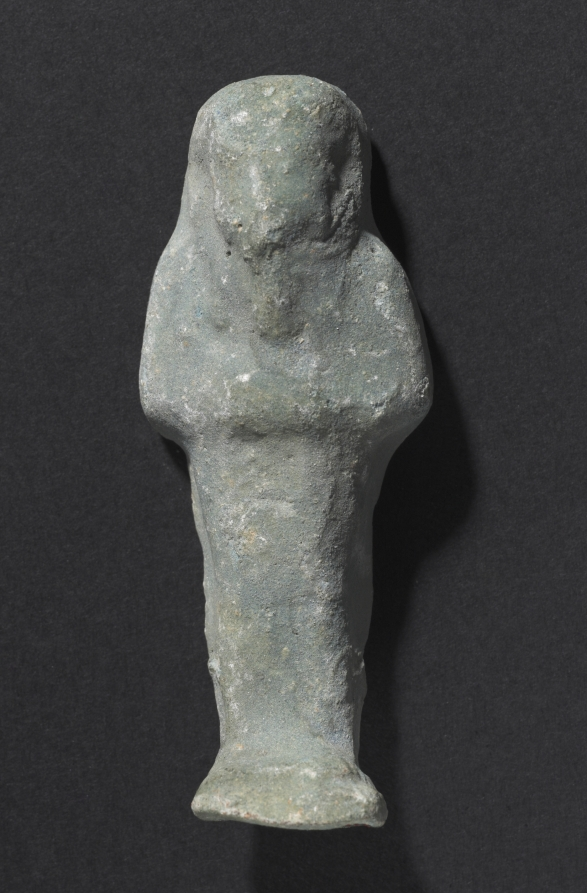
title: Shawabty of Ditamenpaankh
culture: Egypt, Late period (715–332 BCE), Dynasty 25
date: 715–656 BCE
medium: terracotta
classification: Funerary Equipment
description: High demand for shawabtys in the Late Period, a time when as many as 400 or more shawabtys were placed in the tomb with the deceased, gave rise to a specialized container for storing them: the shawabty box. This example is inscribed for the lady of the house, Ditamenpaankh, and was probably one of a pair originally made for her. The single-masted boat on the box's lid is perhaps an allusion to the pilgrimage of the deceased to the holy city of Abydos, the cult city of Osiris, king of the dead. The shawabtys inside are crude, mass-produced examples cast in an open mold. Made of terracotta, their blue paint imitates more costly shawabtys made of faience. As for the shawabty spell, it has been removed from its traditional location on the shawabty's front and relocated onto the sides of box, where it needed only to be written once, thus expediting production.